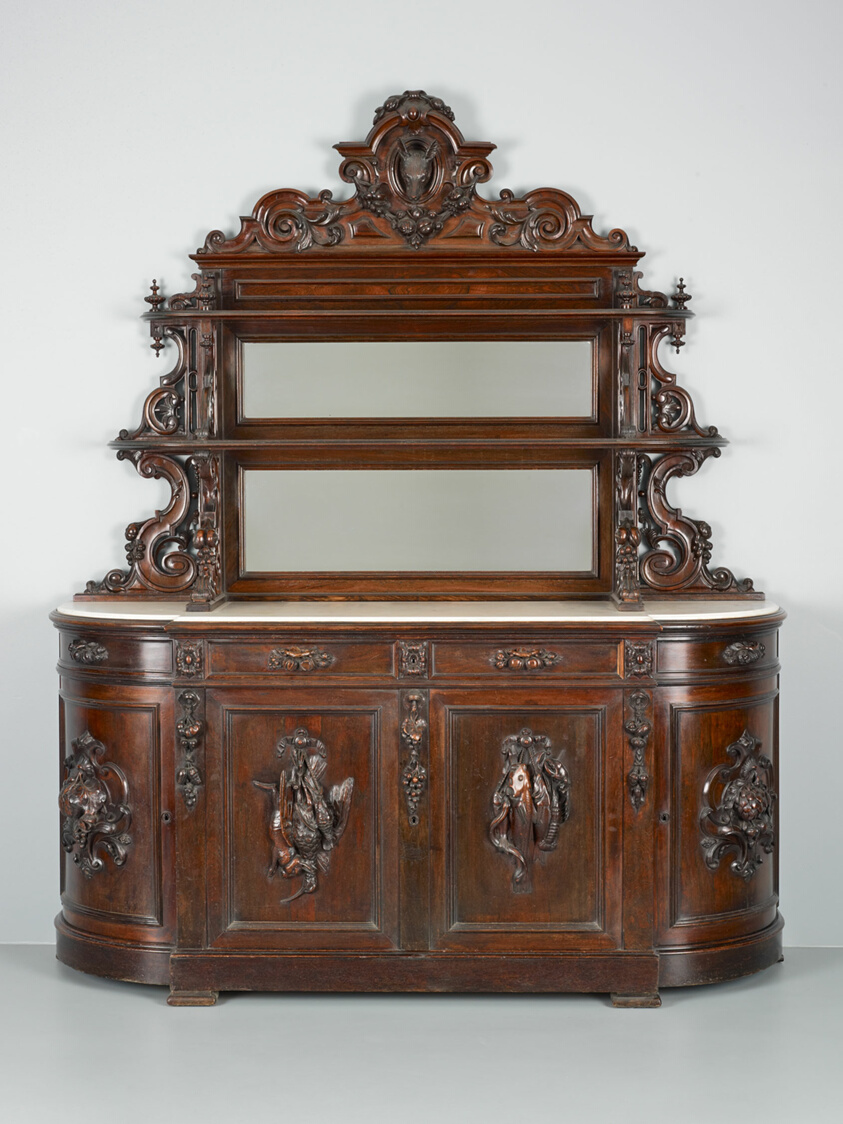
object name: Furniture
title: Sideboard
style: Realism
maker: Alexander Roux (American, born France, c. 1813–1886)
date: 1850–57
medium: Rosewood, walnut, tulip poplar, glass, and marble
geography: New York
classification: case furniture; furniture; american decorative arts; american arts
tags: furniture